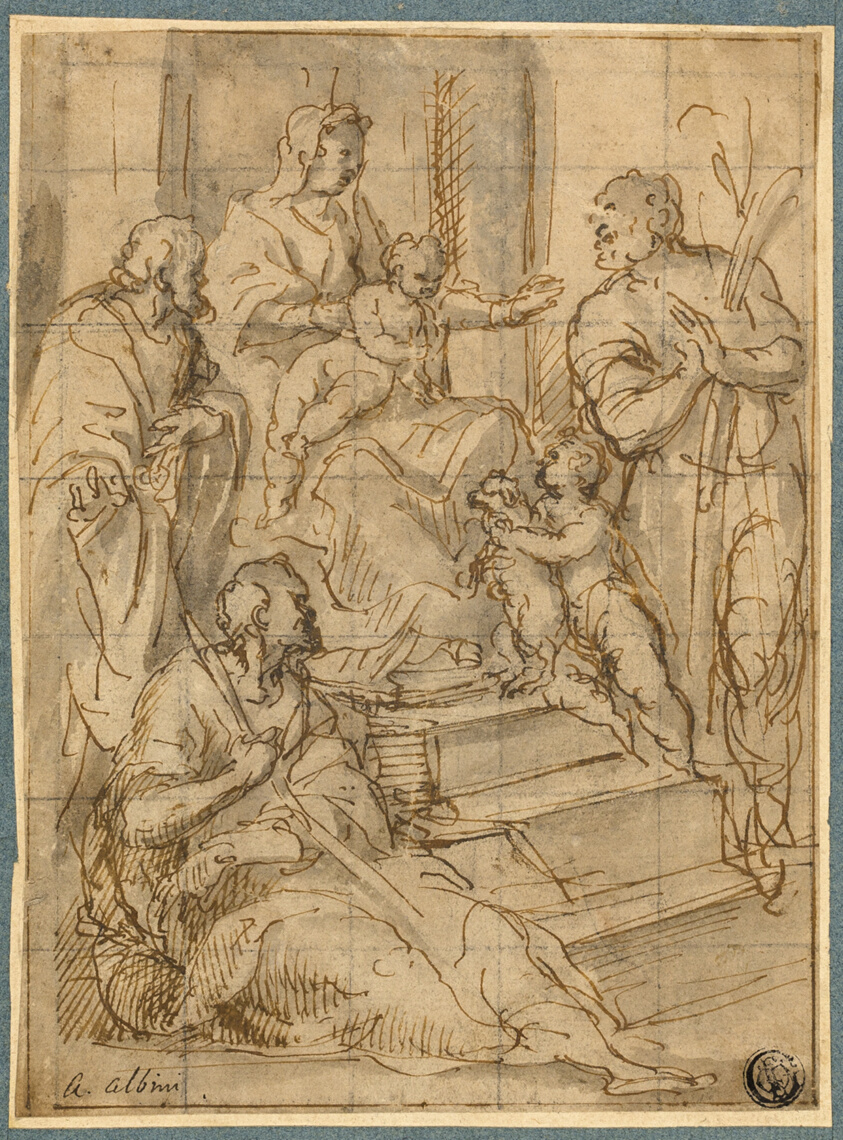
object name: Drawing and Watercolor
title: Holy Family with the Infant Saint John the Baptist and Two Male Saints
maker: Alessandro Albini (Italian, 1568-1646)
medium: Pen and brown ink, with brush and gray wash and traces of graphite, on tan laid paper, squared in graphite, laid down on buff wove card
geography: Italy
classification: pen and ink drawings; drawings (visual works); prints and drawing